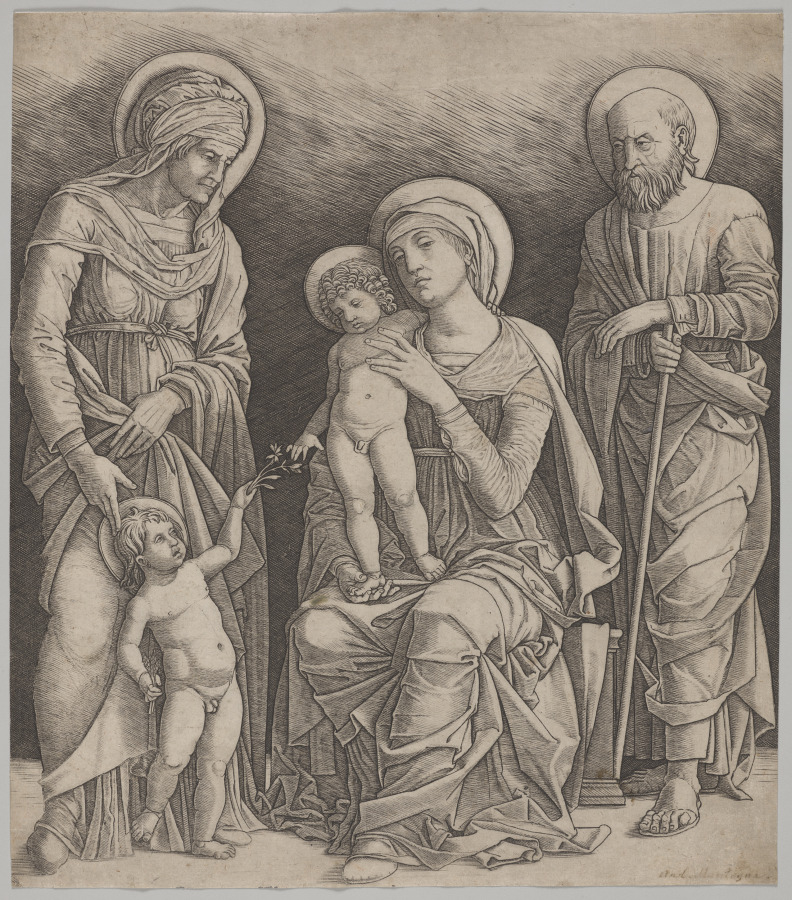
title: Holy Family with St. Elizabeth and the Infant St. John the Baptist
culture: Italy, late 15th-early 16th Century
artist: Giovanni Antonio da Brescia (Italian, about 1460–about 1520)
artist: after Andrea Mantegna (Italian, about 1431–1506)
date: c. 1500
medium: engraving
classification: Print